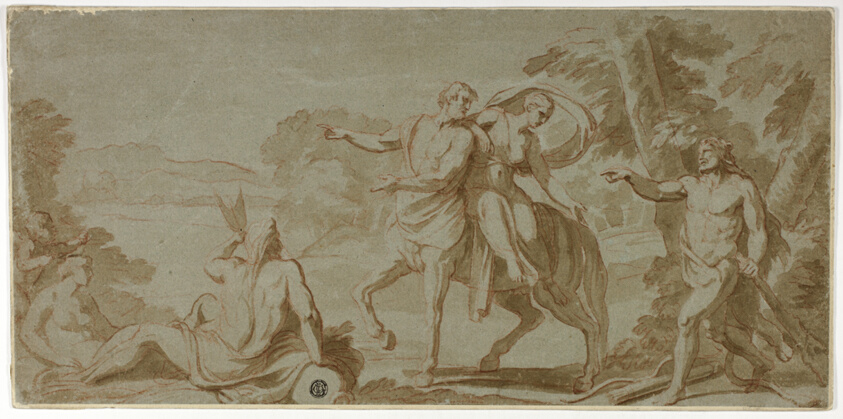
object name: Drawing and Watercolor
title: Nessus, Deianeira and Hercules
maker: School of Charles Le Brun (French, 1619-1690)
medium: Red chalk, with brush and brown wash, heightened with touches of white chalk, on blue laid paper, laid down on ivory laid card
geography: France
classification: ink or chalk wash; drawings (visual works); prints and drawing